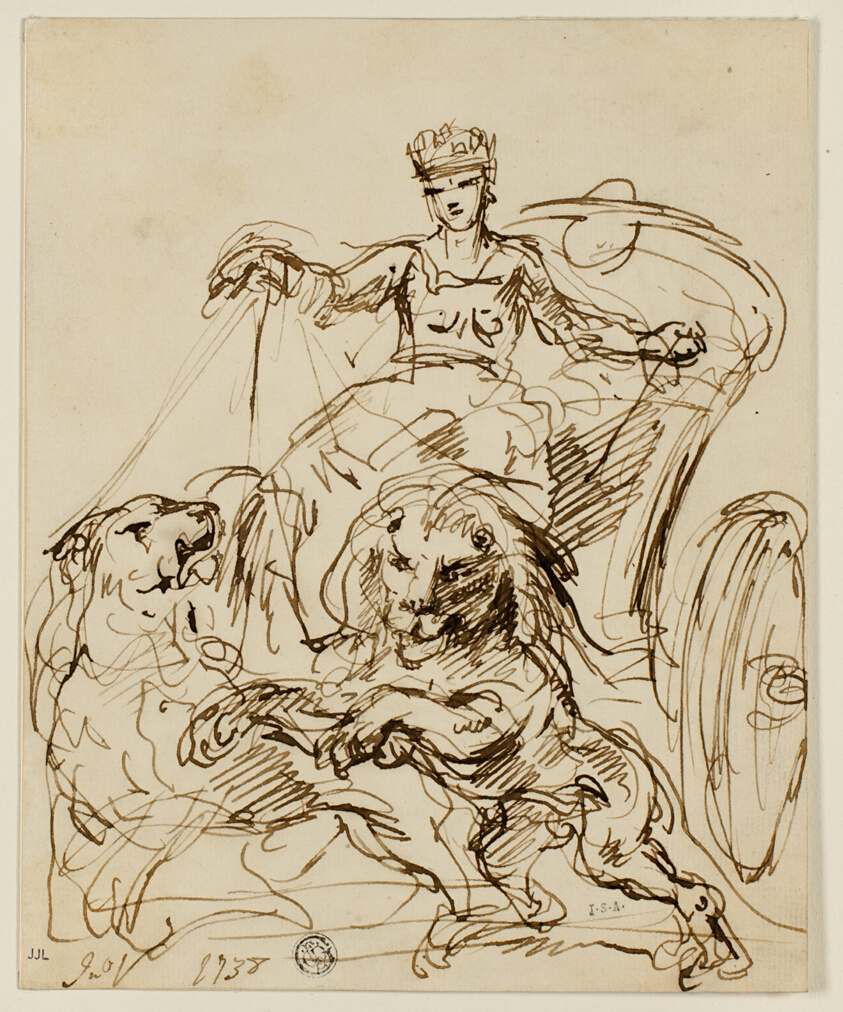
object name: Drawing and Watercolor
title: Cybele on Chariot Drawn by Lions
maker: John Vanderbank (English, 1686-1739)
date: 1738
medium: Pen and brown ink, on cream laid paper, laid down on card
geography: England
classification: pen and ink drawings; drawings (visual works); prints and drawing